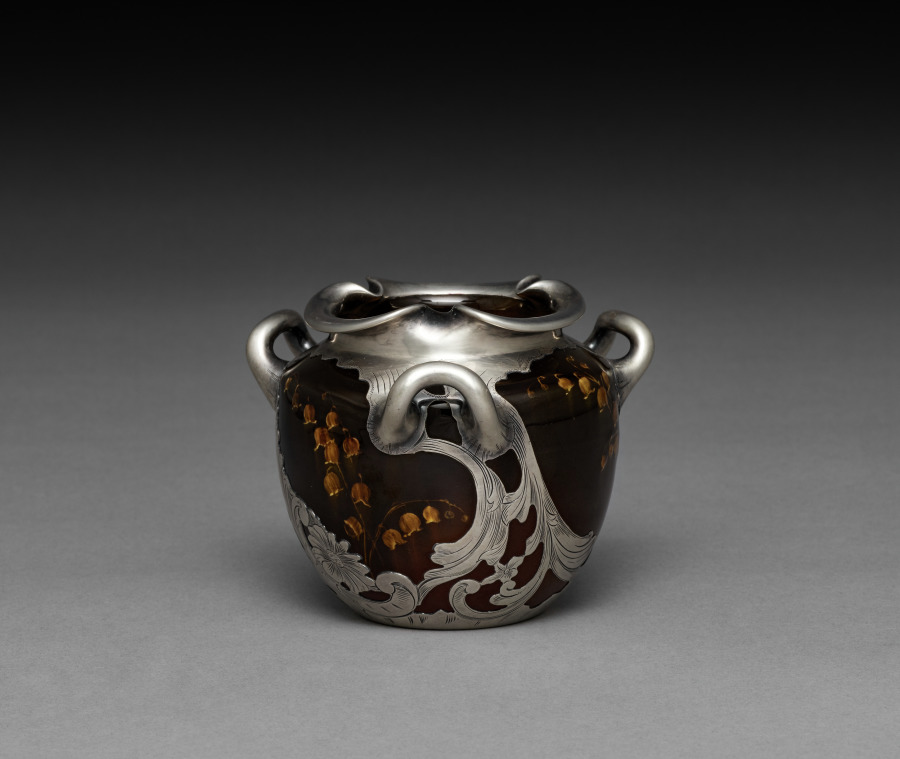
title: Vase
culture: America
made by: Rookwood Pottery Company (American, established 1880)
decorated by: Emma D. Foertmeyer (American)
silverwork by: Gorham Manufacturing Company (America, est. 1831)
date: 1893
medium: earthenware with silver overlay and three silver handles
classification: Ceramic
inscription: Stamped on rim of base: "Gorham MKG. CO."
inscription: Engraved on rime of base: "R. 1531".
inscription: Scratched underside: unidentified lines and sun type image.